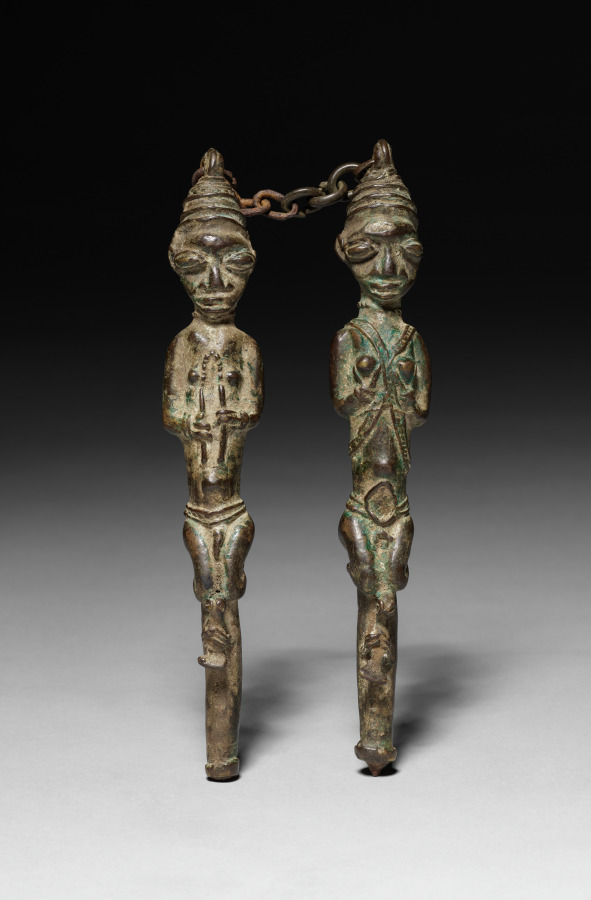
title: Pair of Ritual Staffs (ẹdan Ògbóni)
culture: Africa, West Africa, Nigeria, Yorùbá-style maker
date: 1800s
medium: Copper alloy and iron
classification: Sculpture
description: The chain connecting these two figures allows them to be worn in public by a member of the Ògbóni or Òṣùgbó association as authority emblems. The male on the right gives the association’s typical salute by clasping his left fist on the right one, while the female on the left holds her breasts as a sign of welcome and generosity. The use of copper alloy and iron expresses Ògbóni/Òṣùgbó's concerns with longevity and durability. Long iron spikes would have originally protruded from each figure's base.